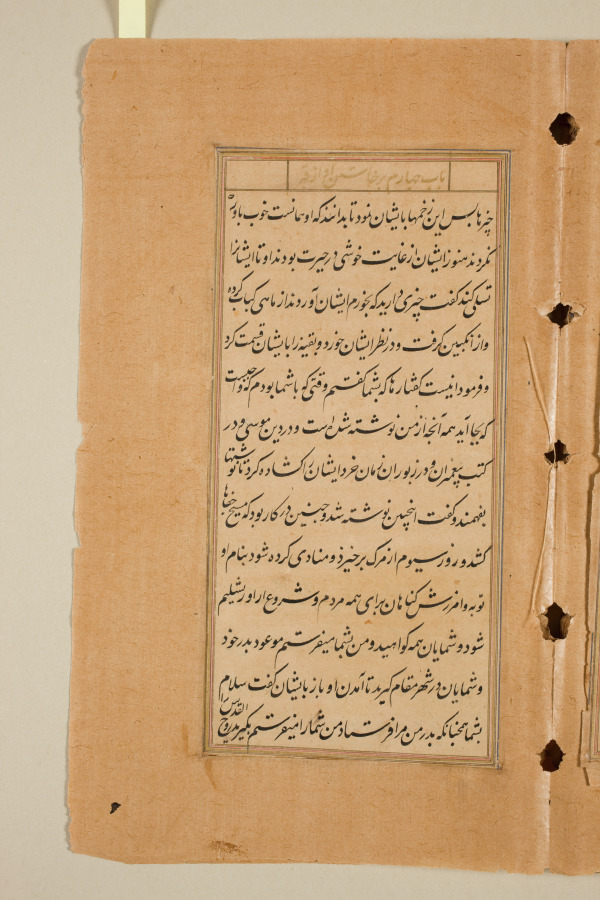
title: Text page from a Mirror of Holiness (Mir’at al-quds) of Father Jerome Xavier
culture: Mughal India, Allahabad, made for Prince Salim (1569–1627)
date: 1602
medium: Ink and gold on paper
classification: Manuscript